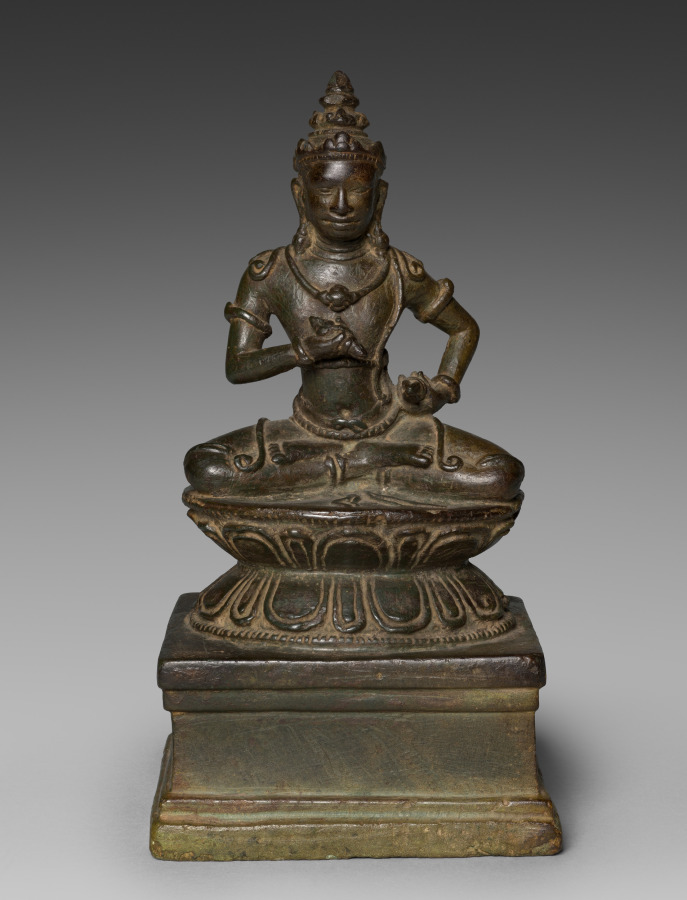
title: Vajrasattva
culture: Cambodia, style of Angkor Thom, 12th-13th century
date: 1100s–1200s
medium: bronze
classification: Sculpture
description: Vajrasattva is a Buddhist being of enlightenment who holds the vajra, or thunderbolt, in his right hand and a bell in his left. The vajra and bell are the basic implements used in tantric rituals that were popular under Jayavarman VII and practiced at Banteay Chhmar. Tantra is a form of Buddhism that makes use of rituals and mantras to aid practitioners in reaching their goals quickly, as though with the speed of lightning. Tantric texts and rituals were used frequently in Cambodia, from the 900s onward, but they were especially prominent under Jayavarman VII. This form of Buddhism appears to have been supplanted by other forms after the 1400s. Small bronze images of Vajrasattva may have been brought out from a temple treasury during the performance of Buddhist rituals that followed the instructions in a Sanskrit text, brought to Cambodia from India, called the Hevajra-tantra. In that text Vajrasattva manifests at key moments in the rituals.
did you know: From the back of the crown hang cords, which drape over the shoulders. The same type of cords hang from the back of the belt, coiling over the legs symmetrically on either side.